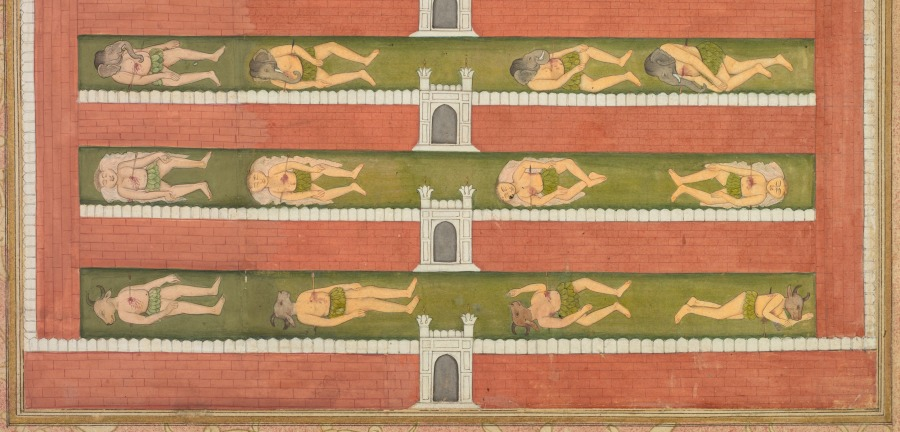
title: A Princess and Demons before a Nobleman: A Leaf from a Poetical Romance Relating to Shah Alam I (recto)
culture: Mughal India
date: c. 1710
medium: Gum tempera, ink, and gold on paper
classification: Painting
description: The source story of this painting remains enigmatic to scholars, but it includes a range of depictions of the “other”––from the foreign to the demonic. A prince kneeling in front of his horse addresses a lady; the moon in front of her face may identify her as Mahliqa (“moonlike” in Arabic), the Chinese princess identified by inscription on the adjacent page. A group of men whose eyes hang vertically stand behind her. Horned figures with grass skirts lie slain behind them, presumably killed by the kneeling prince conspicuously holding a bow. The city in the background, at the top of the painting, is populated solely by women, and its eight surrounding walls are interspersed with slain composite creatures wearing leaf skirts, which may identify them as bands of forest-dwellers, or tribal groups.